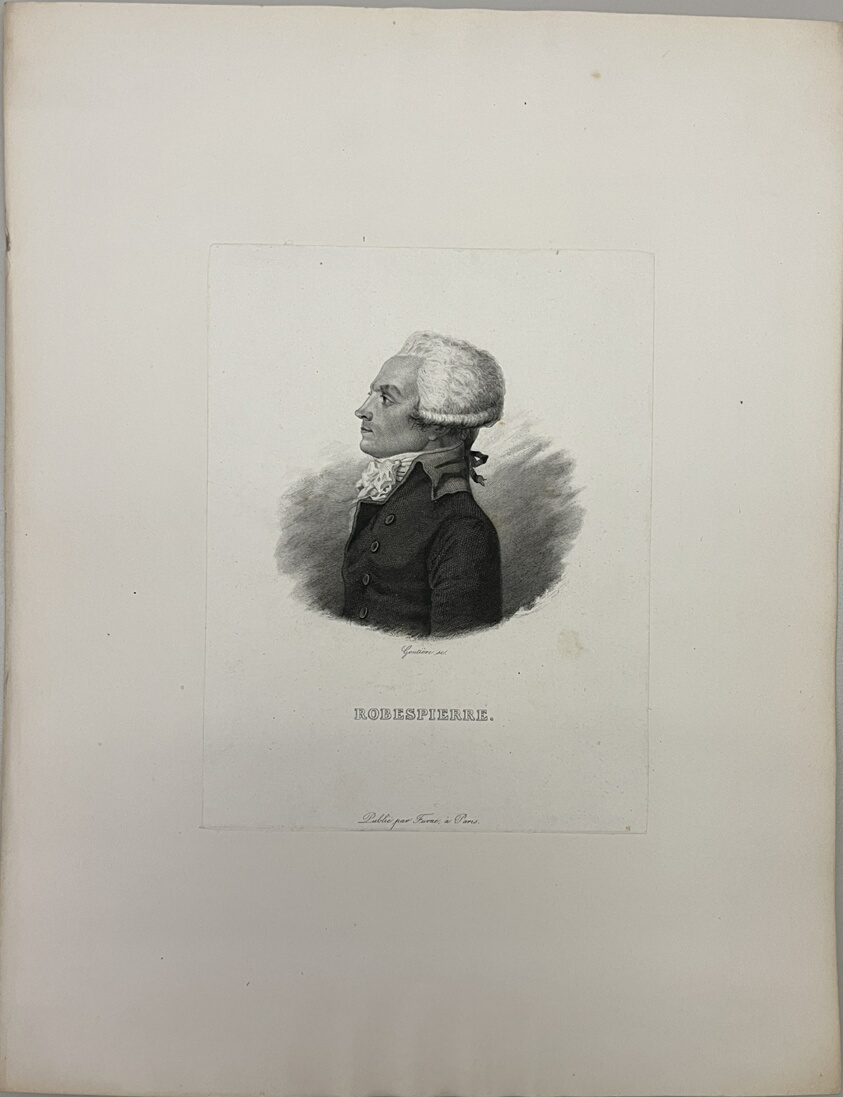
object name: Print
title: Robespierre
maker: Tony Goutière (French, 1808-1890)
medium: Etching on paper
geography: France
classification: reproduction; print; prints and drawing